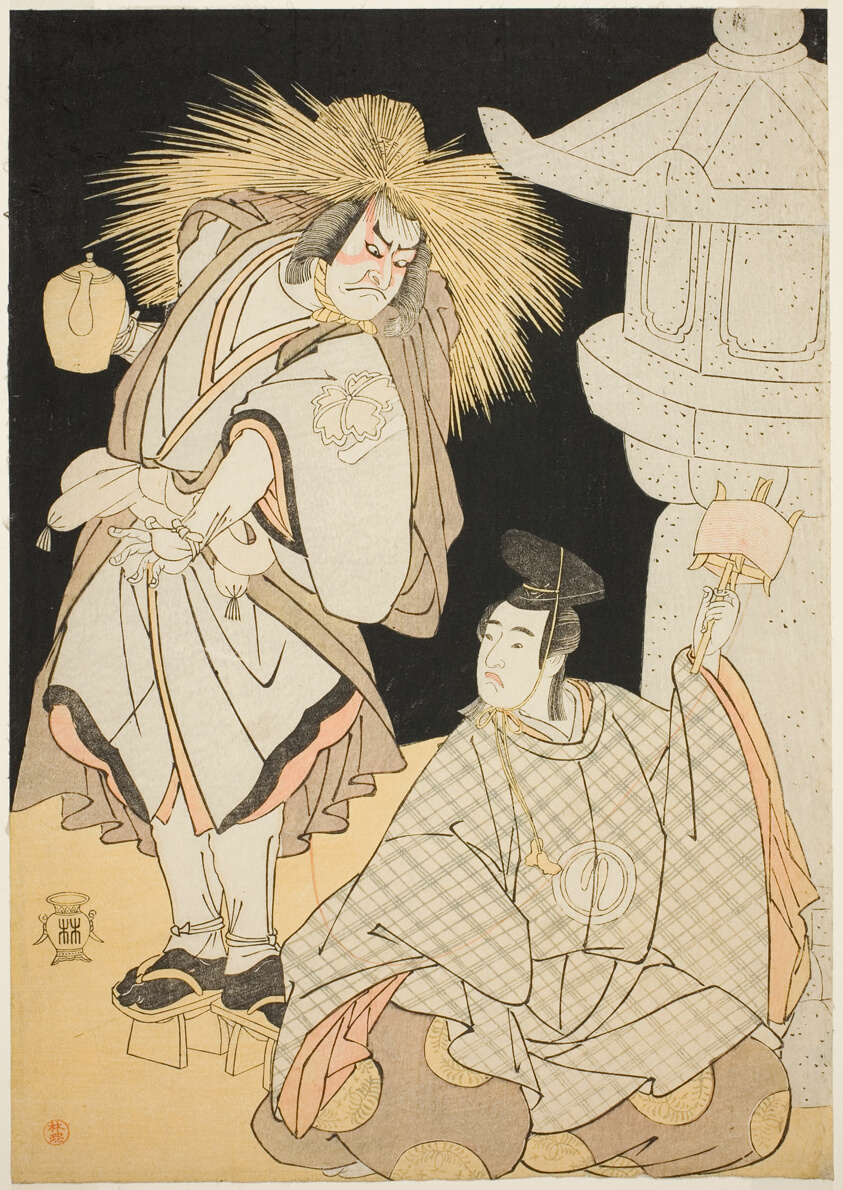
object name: Print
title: Actors Nakayama Kojûrô VI as Osada Tarô Kagemune and Sawamura Sôjûrû III as Komatsu no Shigemori in “Snow-Covered Bamboo: Genji in Long Sleeves” (Yukimotsu Take Furisode Genji)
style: Japanese (culture or style)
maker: Attributed to Katsukawa Shunshô 勝川 春章; Japanese, 1726-1792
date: About 1785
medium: Color woodblock print; aiban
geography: Japan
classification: woodblock print; print; asian art